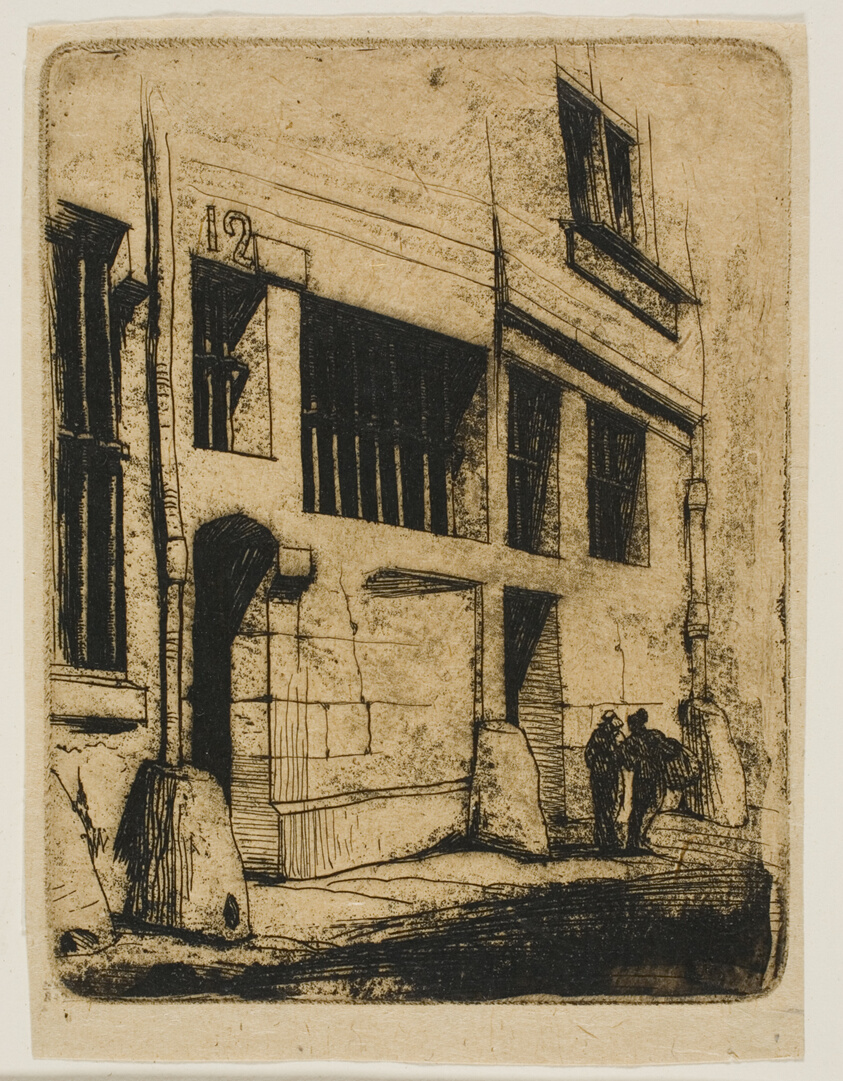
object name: Print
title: La rue des Mauvais Garçons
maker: Charles Meryon (French, 1821-1868)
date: 1854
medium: Etching with roulette (plate is scraped and burnished) on tan wove paper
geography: France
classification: etching; print; prints and drawing